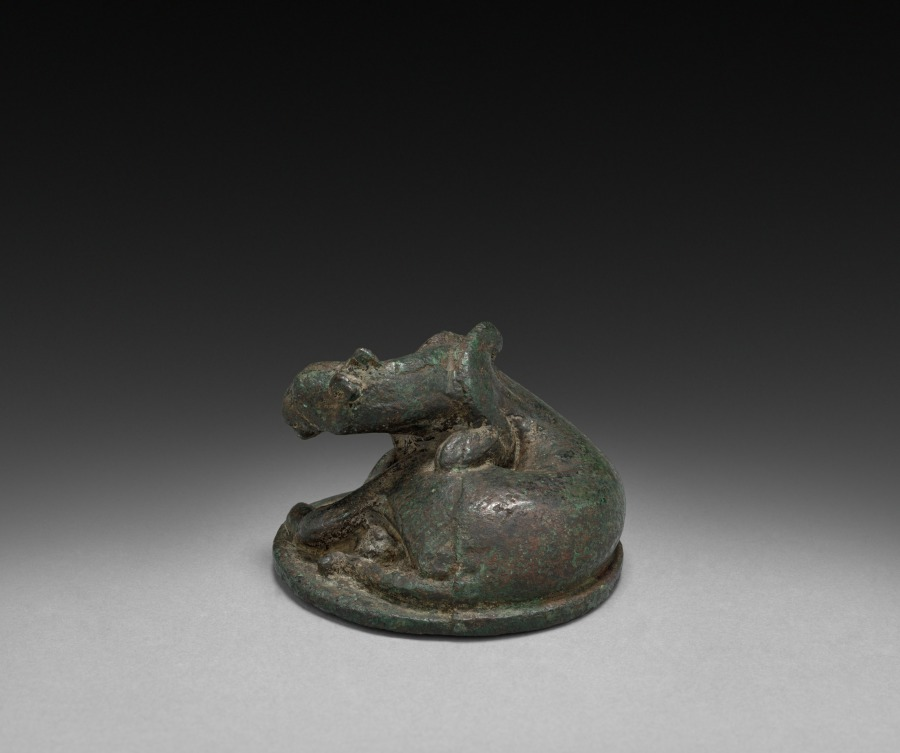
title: Weight in the Form of a Coiled Animal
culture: China, Eastern Han dynasty (25–220 CE)–Six Dynasties (317–581)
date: c. 200s CE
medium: bronze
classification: Sculpture